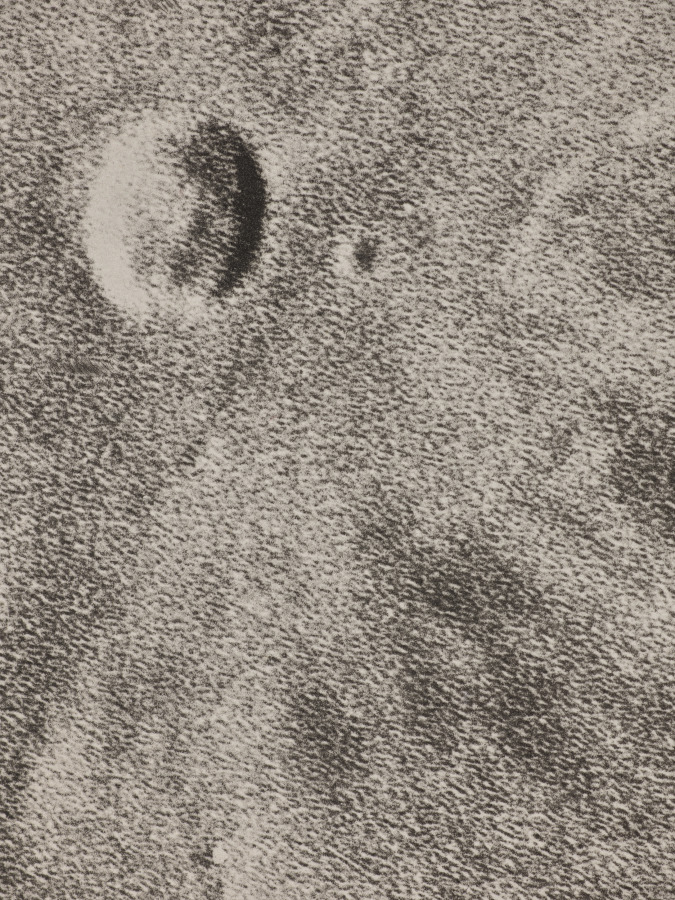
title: Photographie Lunaire: Copernic-Képler-Aristarique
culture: France, 19th century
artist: Maurice Loewy (French, 1833–1907)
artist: Pierre Henri Puiseaux (French, 1855–1928)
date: 1896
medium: photogravure (heliogravure)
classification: Photograph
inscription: Imprinted in black type on recto of photo paper: "Grand Equatorial Coude" Imprinted in black type on recto of photo paper: "1896. 29 Septembre 16 h O.tin.Paris Agrandissement 8.75 Diametre Lunaire 1 m 43" Imprinted in black type along each edge: "1-9" Imprinted in black type on gallery label on verso: "Fraenkel Gallery/49 GEARY STREET SAN FRANCISCO 94108/FURTHERMORE/[30TH Anniversary Exhibition]/Fraenkel Gallery/April 22-June 26, 2010" Imprinted in black type on gallery label on verso: "Fraenkel Gallery/49 GEARY STREET SAN FRANCISCO 94108/LOEWY & PUISEUX/Photographie Lunaire: Copernie-Kepler-/Aristarique, Septembre 29, 1896 heliogravure/22-1/2 x 18-3/4 inches (image)/29-1/2 x 22 inches (sheet)/Plate XVI/[LP.0302.Z]"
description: This plate is from a deluxe 12-volume atlas of the moon created by astronomers Maurice Loewy and Pierre Henri Puiseaux. The atlas remained the most accurate reference of the moon’s surface until the age of space travel. The duo captured thousands of images at the Paris Observatory through a telescope that Loewy invented. It was equipped with a mechanism that tracked the moon’s movements during the exposures. Given weather conditions, they were only able to photograph 50 to 60 nights per year; the project thus took 15 years to complete and contained nearly 100 large-scale photogravures.